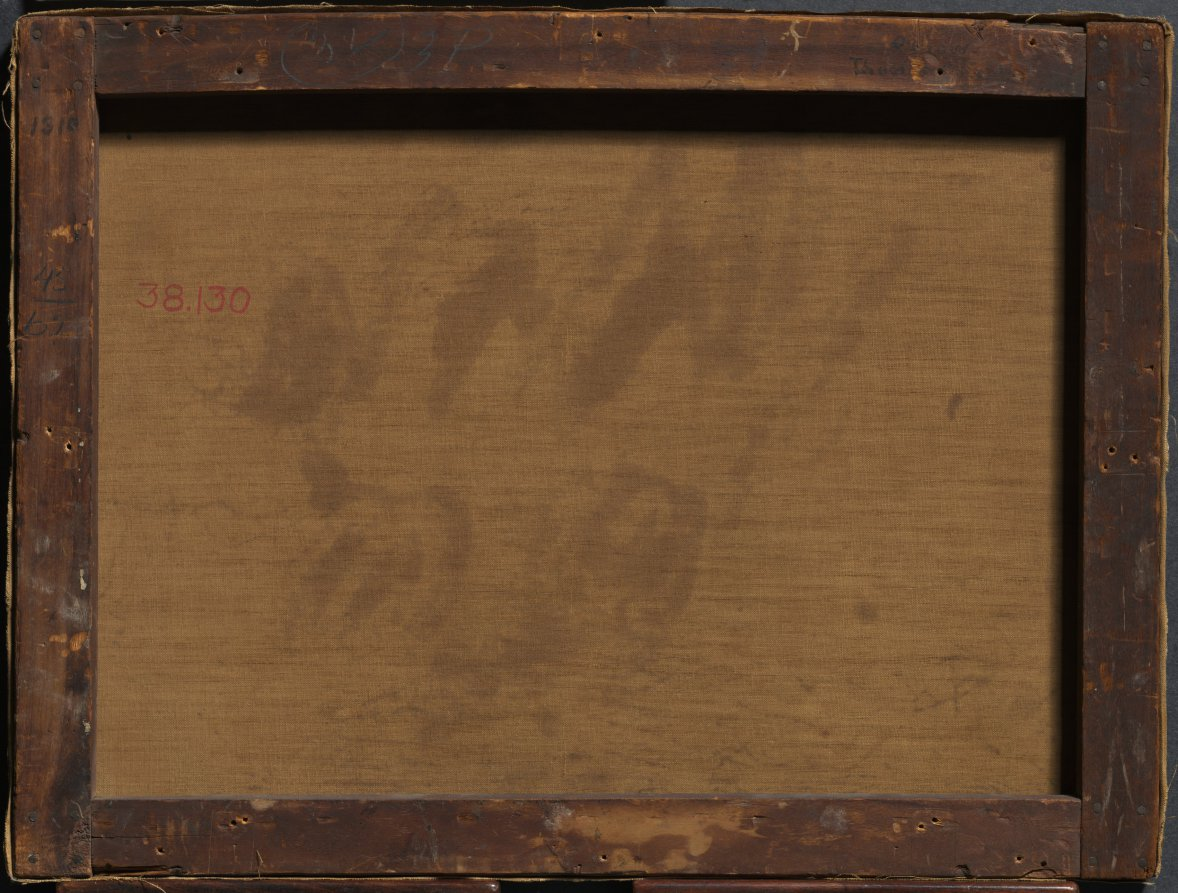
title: The Oxbow Seen from Mount Holyoke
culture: France, 19th century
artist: attributed to Victor de Grailly (French, 1804–1889)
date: after 1840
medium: oil on fabric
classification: Painting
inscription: An original signature is not apparent; the initials T. C. can be seen in a light violet color, centrally located along the bottom edge